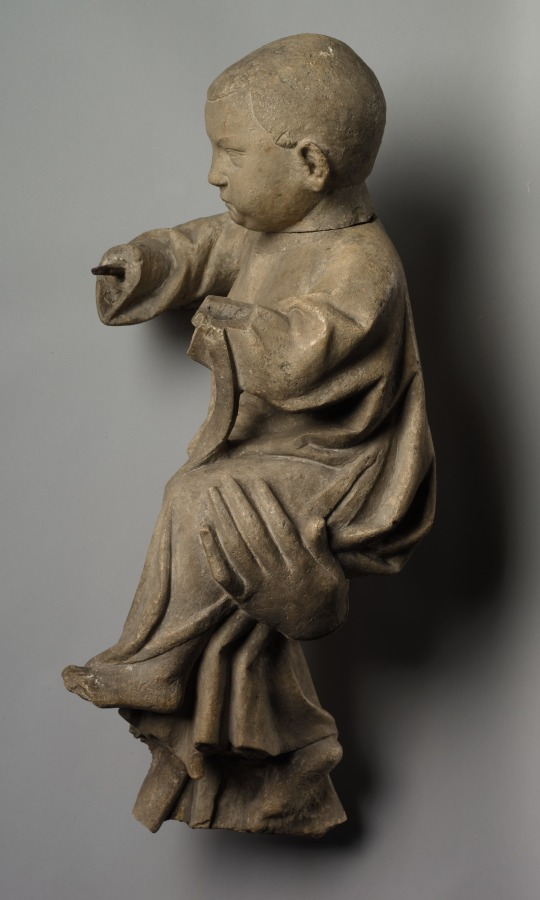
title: Figure of a Child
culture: France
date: 1300s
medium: stone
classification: Sculpture